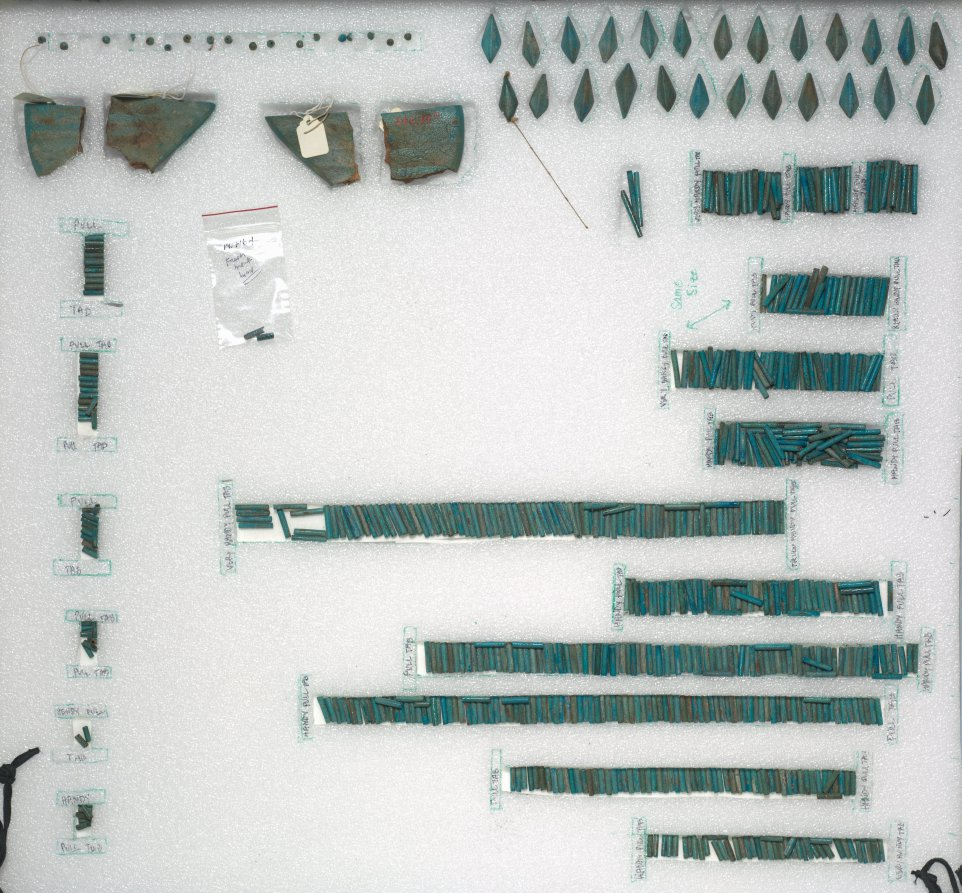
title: Jewelry of Senbi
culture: Egypt, Middle Kingdom (2040–1648 BCE)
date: 1980–1801 BCE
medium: blue-to-turquoise faience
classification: Jewelry